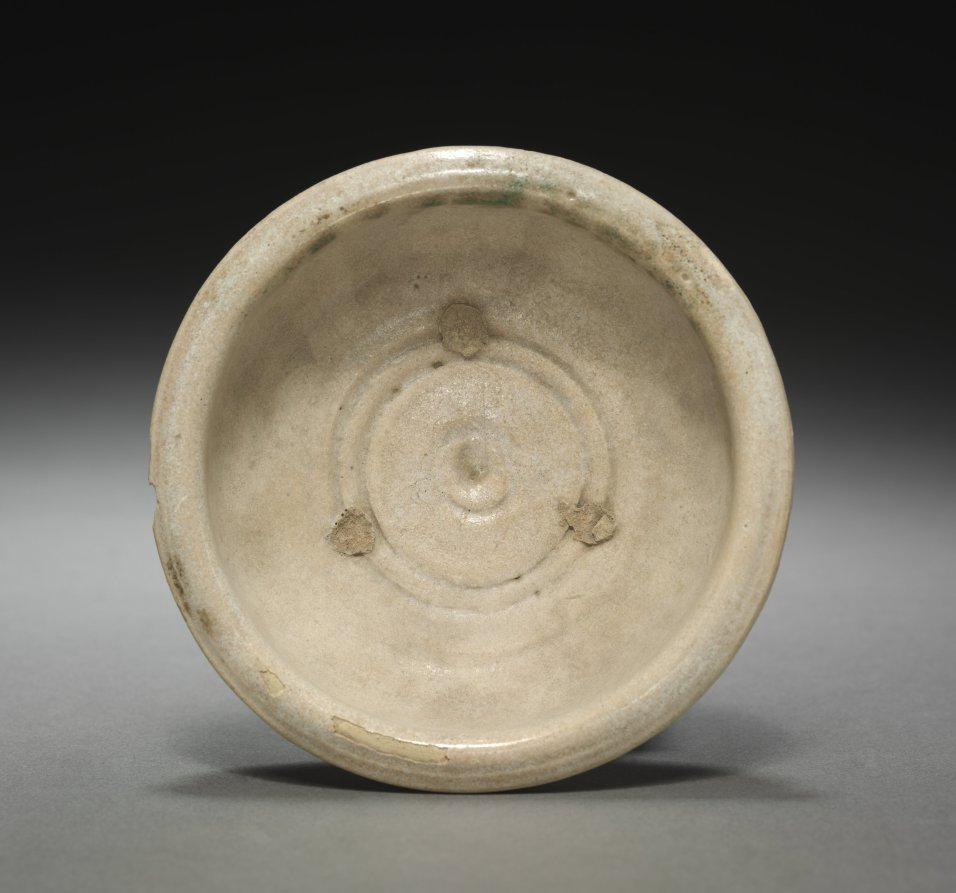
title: Small Bowl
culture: Parthian Empire (247 BCE–224 CE)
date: 1–200 CE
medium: terracotta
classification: Ceramic